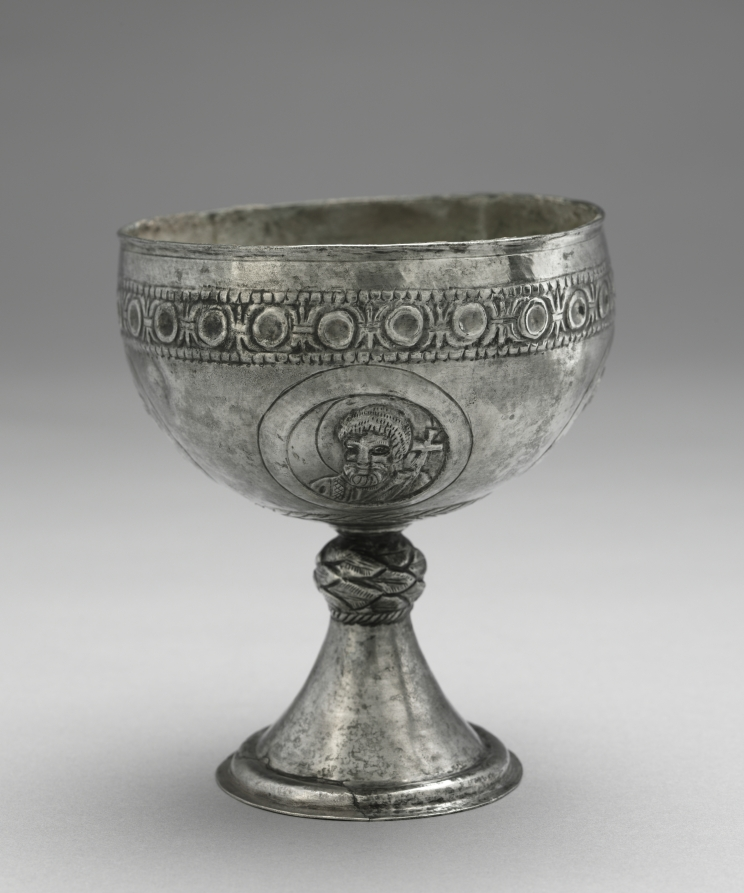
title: Chalice from the Beth Misona Treasure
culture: early Byzantium, Constantinople or Syria, Byzantine period, 6th-7th Century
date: c. 500–700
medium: silver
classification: Metalwork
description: These four liturgical silver vessels—a paten and three chalices (1950.378–81)—form what is now called the Beth Misona Treasure, named for the village in northern Syria for which the objects were made. While nothing is known about the exact location and circumstances of the treasure's discovery, the people of the village of Beth Misona were, like other Christian communities in Syria and Palestine, probably forced to bury their church silver to hide it from the Persians or Arabs, who conquered their lands in the first half of the 600s. The paten, which held pieces of Eucharistic bread used during Mass, is decorated with an engraved Latin cross surrounded by a dedicatory inscription that names the paten's donor—Domnos—and its original location, the church of Saint Sergios in Beth Misona. The chalices, which contained the Eucharistic wine used during Mass, feature broad cups decorated with portrait busts of Saints Peter and Paul, Christ, and the Virgin. One chalice bears a dedicatory inscription naming its donor—Kyriakos, Domnos's son—and the priest of the church that received the pious gift—Zeno.